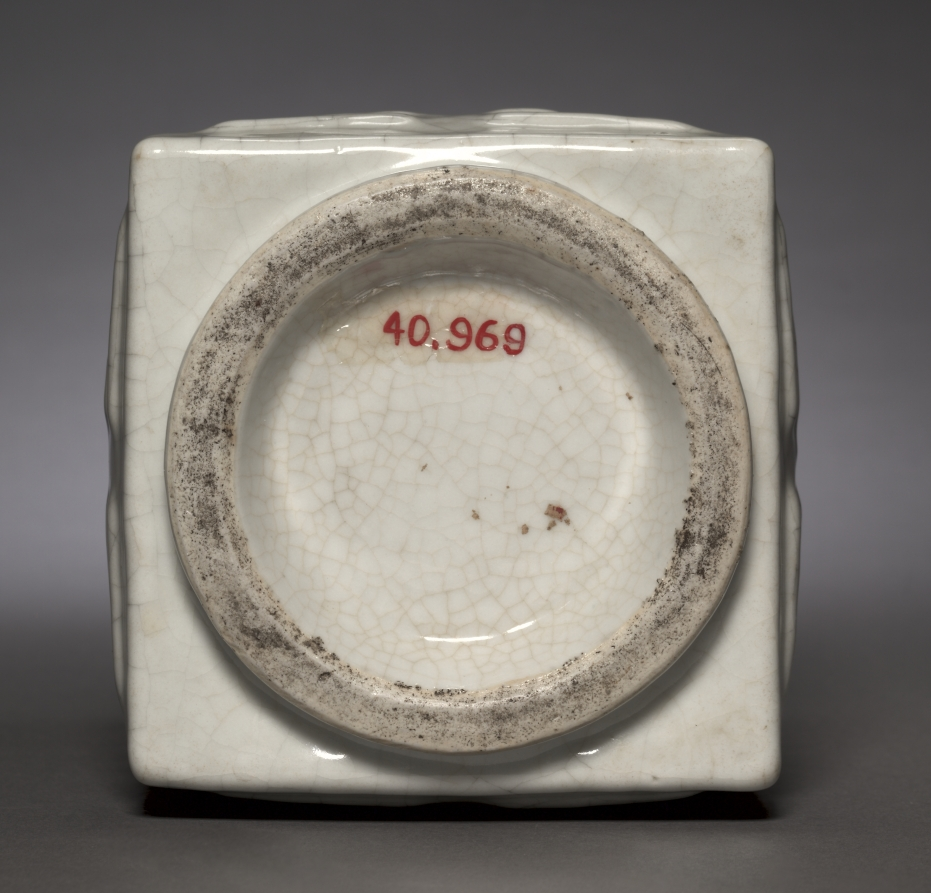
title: Vase with the Eight Trigrams Design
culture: China, Qing dynasty (1644–1911), Qianlong reign (1736–95)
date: 1736–95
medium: porcelain with a crackled Ge-type glaze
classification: Ceramic